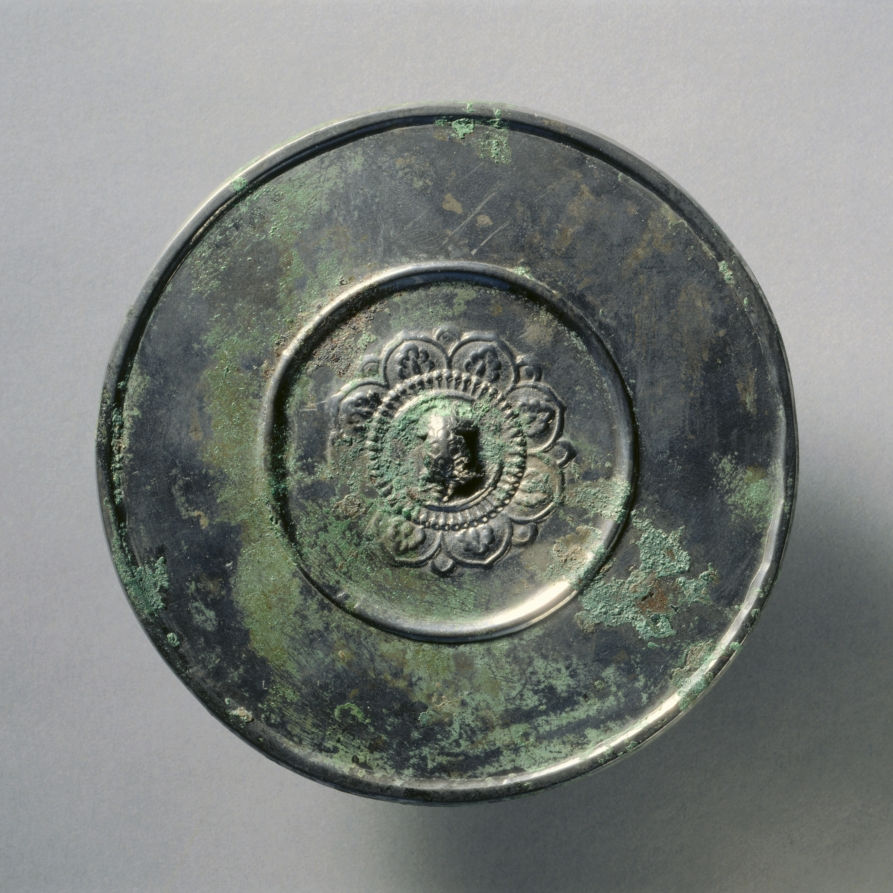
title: Mirror of Tortoise Knob and Lotus Pattern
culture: China, Tang dynasty (618-907)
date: early 600s-early 900s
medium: bronze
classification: Metalwork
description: The mirror retains much unaltered metal. The back of the mirror was highly polished and the reflecting properties of the high tin bronze can be easily observed.